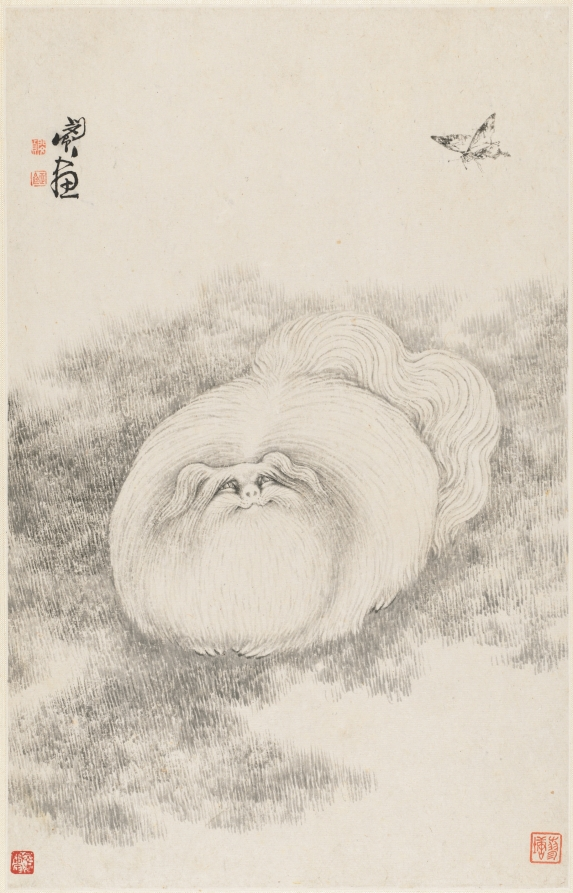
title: Cat and Butterfly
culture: China, Qing dynasty (1644-1911)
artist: Min Zhen (Chinese, 1730–after 1788)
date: 1788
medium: album leaf, ink on paper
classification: Painting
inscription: Six seals appearing on the leaves: Min Zhen 閔貞; Zheng zhai 正齋; Qingqiao 青橋; Zhen 貞; Liao tang 蓼塘; Min Zhen zhi yin 閔貞之印。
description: Min Zhen, who was orphaned at age 12 and developed an eccentric personality, was trained by Tang Yin (1682–1756), a writer, playwright, and superintendent of the imperial porcelain workshops in Jingdezhen. The connection to him may have enabled Min to stay in Beijing for a decade from around 1773. It is not clear whether he ever resided in Yangzhou, but his style is in many instances reminiscent of that of Yangzhou artist Huang Shen. The album was painted for his friend Dailili Shanren in exchange for a scholar’s stone. The paintings demonstrate the artist’s versatility and mature style in the last years of his life. While two leaves are rendered in unconventional compositions seen from above (Cat and Butterfly CMA 1985.71.5) and below (Banana Plant CMA 1985.71.11), they have a humorous touch. “Cat and butterfly” is a homophone for the Chinese characters “mao die,” meaning “octogenarian,” and express the wish for the recipient’s longevity. The banana plant stands for the world of literati but can also allude to Buddhism.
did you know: Cat and butterfly are homophones for the characters “mao die” 耄耋 (octogenarian), so this painting expresses hope that the artist's friend will live a long life.